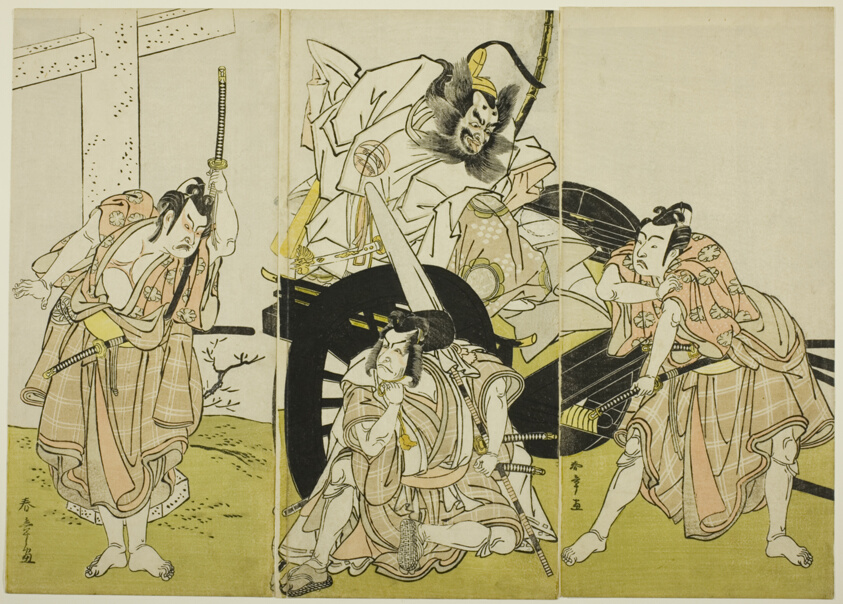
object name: Print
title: Actors Nakajima Mihoemon II as Fujiwara no Shihei, Ichikawa Ebizô III as Matsuo-maru, Ichikawa Yaozô II as Sakura-maru, and Ichimura Uzaemon IX as Umeo-maru in “Sugawara’s Secrets of Calligraphy” (“Sugawara denju tenarai kagami”)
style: Japanese (culture or style)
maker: Katsukawa Shunshô 勝川 春章; Japanese, 1726-1792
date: About 1776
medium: Color woodblock prints; hosoban triptych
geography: Japan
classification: woodblock print; print; asian art